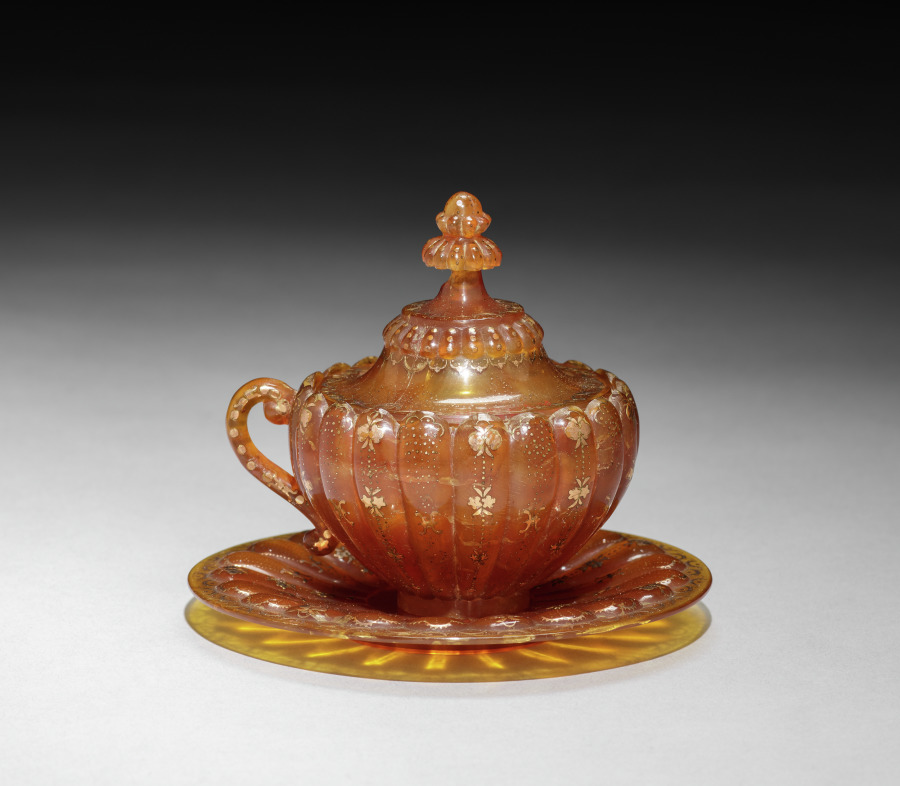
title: Covered Cup and Saucer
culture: France, 18th century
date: c. 1730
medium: amber decorated with inlaid gold and mother-of-pearl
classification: Miscellaneous